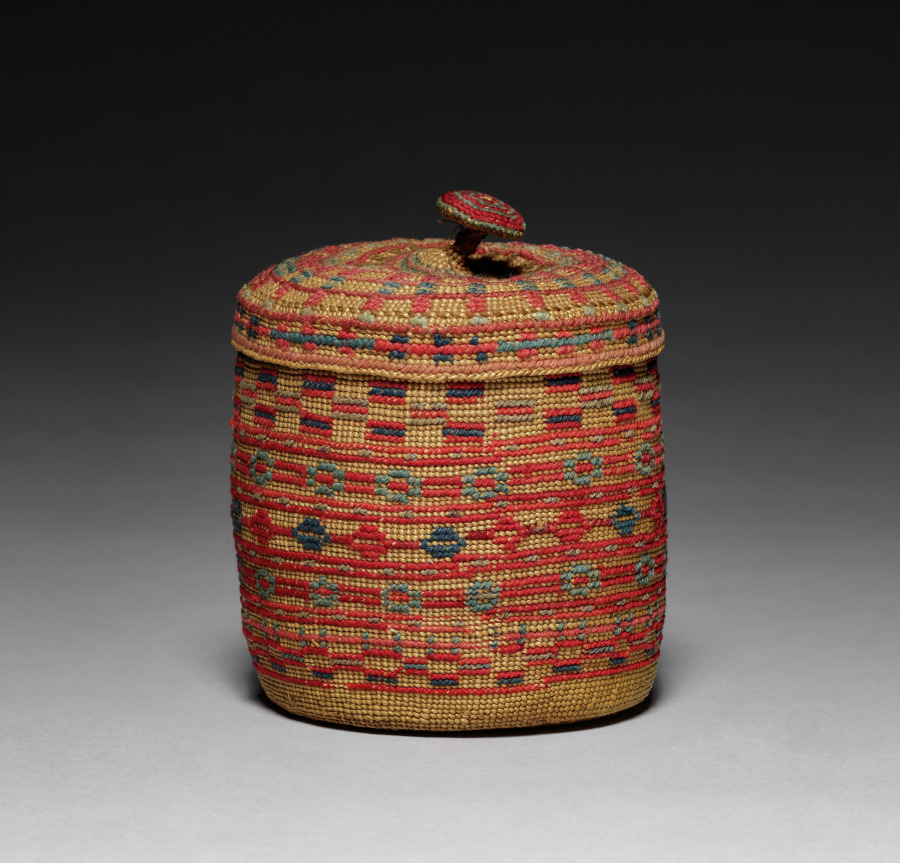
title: Covered Basket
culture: Arctic, Aleut, late 19th-early 20th century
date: late 1800s–early 1900s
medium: wool embroidery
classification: Basketry